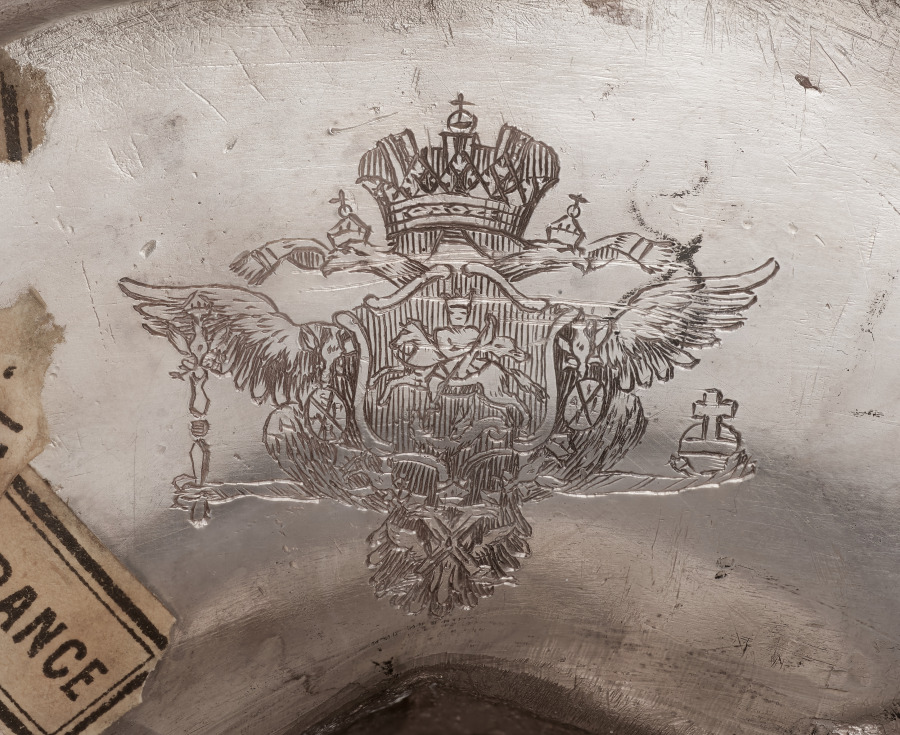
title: Candelabrum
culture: France, Paris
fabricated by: François Thomas Germain (French, 1726–1791)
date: 1757–58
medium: silver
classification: Silver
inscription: [Charge mark of Eloy Brichard , 1756−1762, beneath base]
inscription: [Warden's mark for Paris, 1757-1758, beneath base]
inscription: [Discharge mark for work intended for export, 1756−1775, on base]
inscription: [Hallmarks for Saint Petersburg, on base]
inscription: [Assayer mark of Ivan Frolov, on base]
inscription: [Russian standard of the French silver, on base]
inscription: [Maker’s mark of Francois-Thomas Germain, master silversmith on October 16, 1748, beneath drip pan one each of three bobeches]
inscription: [Charge mark Of Eloy Brichard, 1756−1762, beneath drip pan one each of three bobeches]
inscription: [Discharge mark for work intended for export, 1733 (?)−1775, beneath drip pan one each of three bobeches]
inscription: [Warden's mark for Paris, 1757−1758, beneath drip pan one each of three bobeches]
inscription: [Assayer mark of Ivan Frolov, beneath drip pan of one of three bobeches]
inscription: [Russian standard of French silver, beneath drip pan of one of three bobeches]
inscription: [Charge mark for large work of Eloy Brichard, 1756−1762, on candelabra bayonet attachment]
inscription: [Discharge mark for work intended for export, on candelabra bayonet attachment]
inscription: [Beneath base]: “Fait. Par. F. T. Germain. Sculp[teu]r. Orf[ev]re. Du Roy. Aux. Galleries. Du Louvre. A Paris. 1758”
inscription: [Beneath base]: "Du no.32"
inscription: [Beneath base]: "No 465"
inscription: [Engraved Russian Imperial coat-of-arms, beneath base]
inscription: [Modern inscription in a round paper label, beneath base]: “[?]8” [printed in black]: “3120” [written in pencil]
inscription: [Modern inscription in a rectangular paper label, beneath base]: “…IN/FRANCE” [printed in black]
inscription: [Modern inscription in a rectangular paper label, beneath base]: “46” [written in black ink]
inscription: [Engraved cipher composed with two “M”’s (?) surmounted by a royal crown, on base]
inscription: [Engraved, on base]: "No 465"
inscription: [Engraved, on base]: "du No 32"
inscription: [Engraved cipher composed with two “M”’s (?) surmounted by a royal crown, on one bobeche]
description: This candelabrum is part of a pair. Its design blurs the line between function and decoration. The arms twist and curve, appearing as flower stems while physically supporting the candles. Though this visual unity is typical of the Rococo style, the influence of the rising neoclassical style is evident in the allegorical scenes of light that decorate each candelabra’s stem.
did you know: These candelabra are part of a dinner service sent from Paris, France, to Saint Petersburg, Russia, in two separate shipments, the first of which contained 270 objects for 8 dozen place settings.